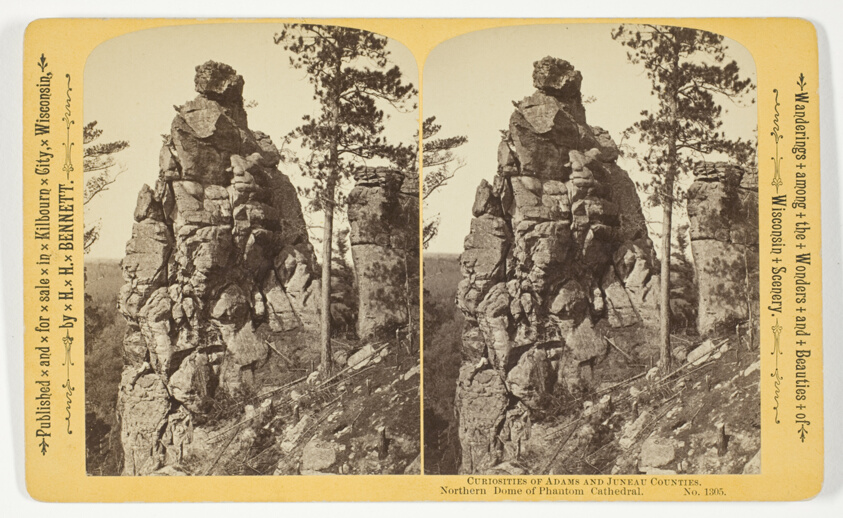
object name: Photograph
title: Northern Dome of Phantom Cathedral, No. 1305 from the series "Curiosities of Adams and Juneau Counties"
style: 19th century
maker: Henry Hamilton Bennett (American, born Canada, 1843-1908)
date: 1870/1908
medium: Albumen print, stereo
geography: Wisconsin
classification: photography; photograph; albumen silver print; stereograph (albumen)